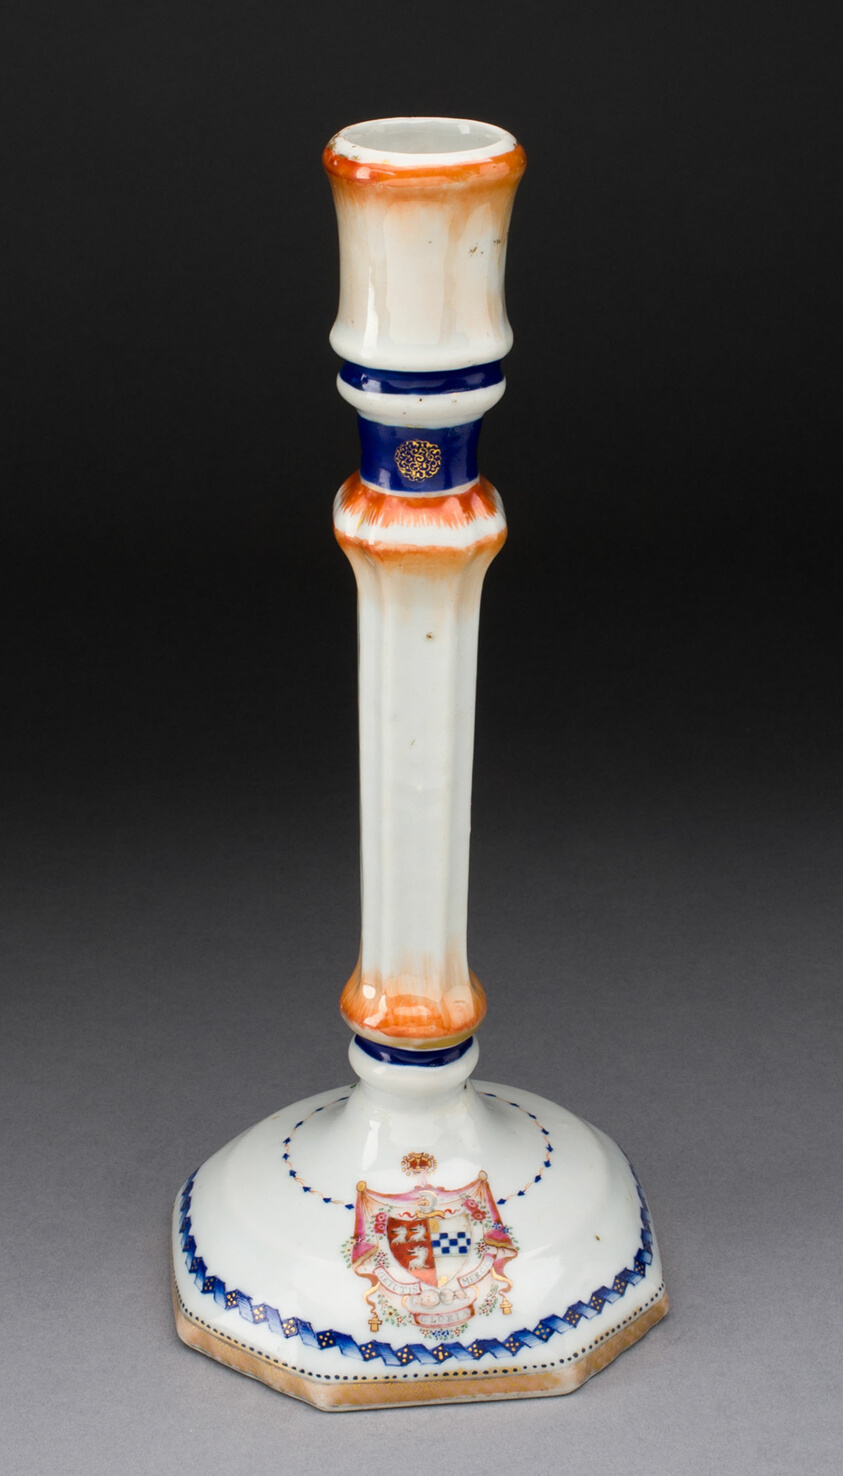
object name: Ceramics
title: Candlestick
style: chinese export, Chinese (culture or style), East Asian, asian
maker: China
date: 1775/1800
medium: Hard-paste porcelain with polychrome enamels and gilding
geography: Jingdezhen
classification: candleholder - candlestick; candleholder; chinese export porcelain; porcelain; european decorative arts; ceramics